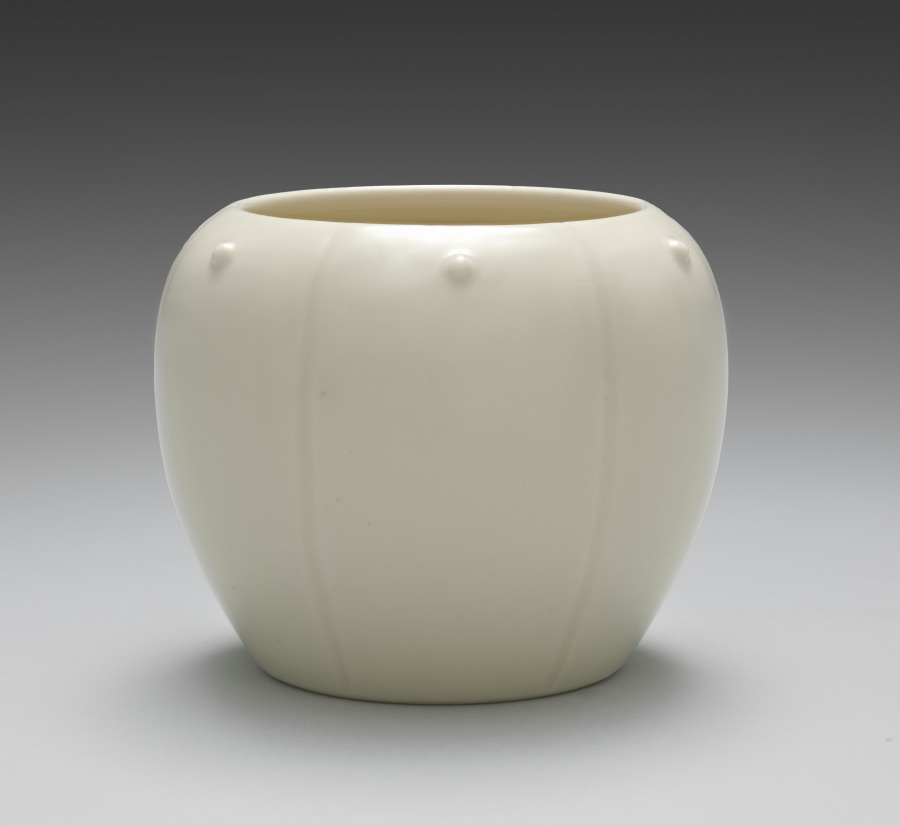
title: Container from Lit Charcoal and Ash Containers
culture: Japan, Meiji period (1868–1912)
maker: Seifū Yohei III (Japanese, 1851–1914)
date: 1893–1914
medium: One from a set of four containers; porcelain with molded design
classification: Ceramic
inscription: 清風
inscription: The storage box for this set is inscribed and impressed with seals.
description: The box lid for these six-lobed lit charcoal and ash containers, or hiire, identifies them as kōhakuji, another of Yohei III’s translucent cream colors over ivory clay bodies. One might translate the name as “lustrous pearl[–glazed ivory] porcelain.” A hiire was filled with ash with burnt coals at the center so that embers and tobacco ash could be discarded safely during a gathering. Each of the lobes on the containers has a round protrusion set below the rim. The studlike pattern is called ruiza. The term is also used to describe the pattern that rings the shoulder of some flower vases or metal kettles used in chanoyu.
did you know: The Seifu studio generally followed the standard practice in Japan for identifying the artist and object in box inscriptions.